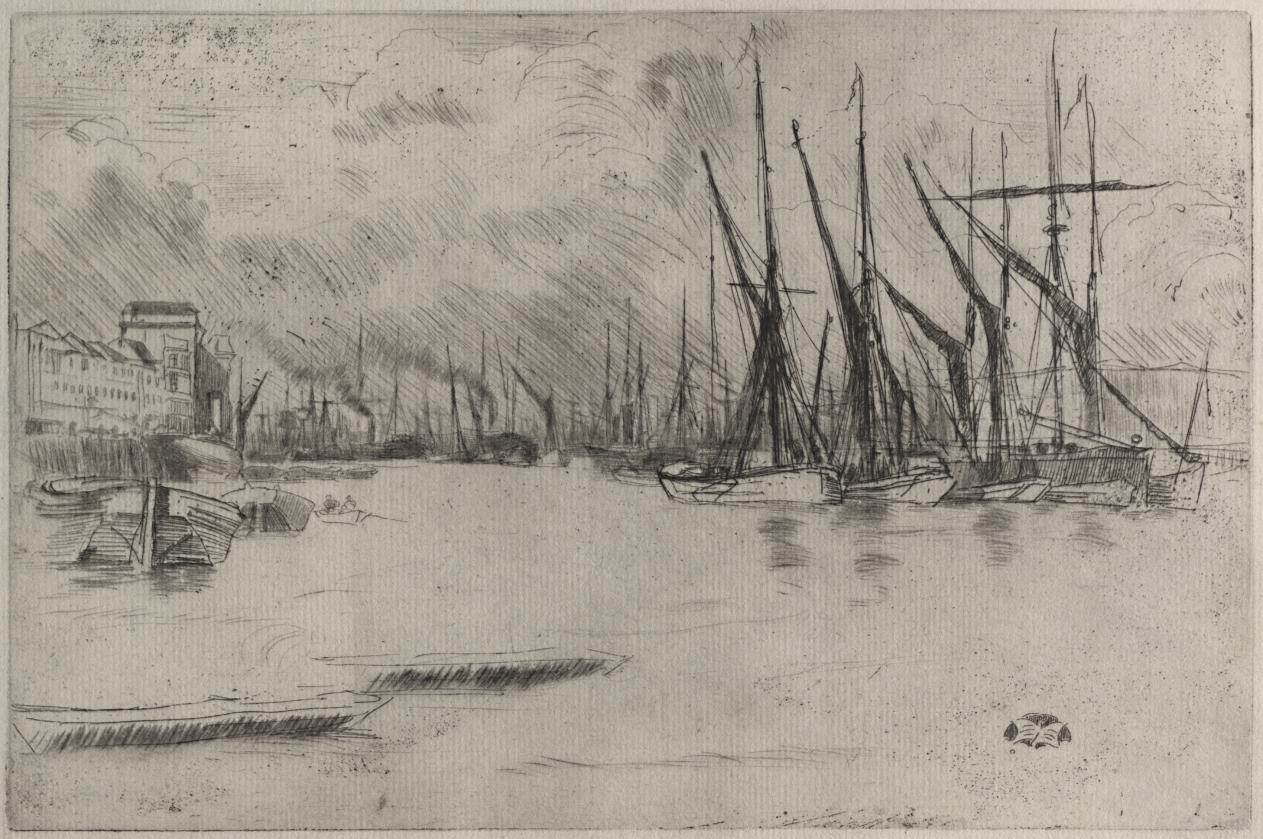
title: From Pickle Herring Stairs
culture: America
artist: James McNeill Whistler (American, 1834–1903)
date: 1876–77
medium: etching and drypoint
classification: Print